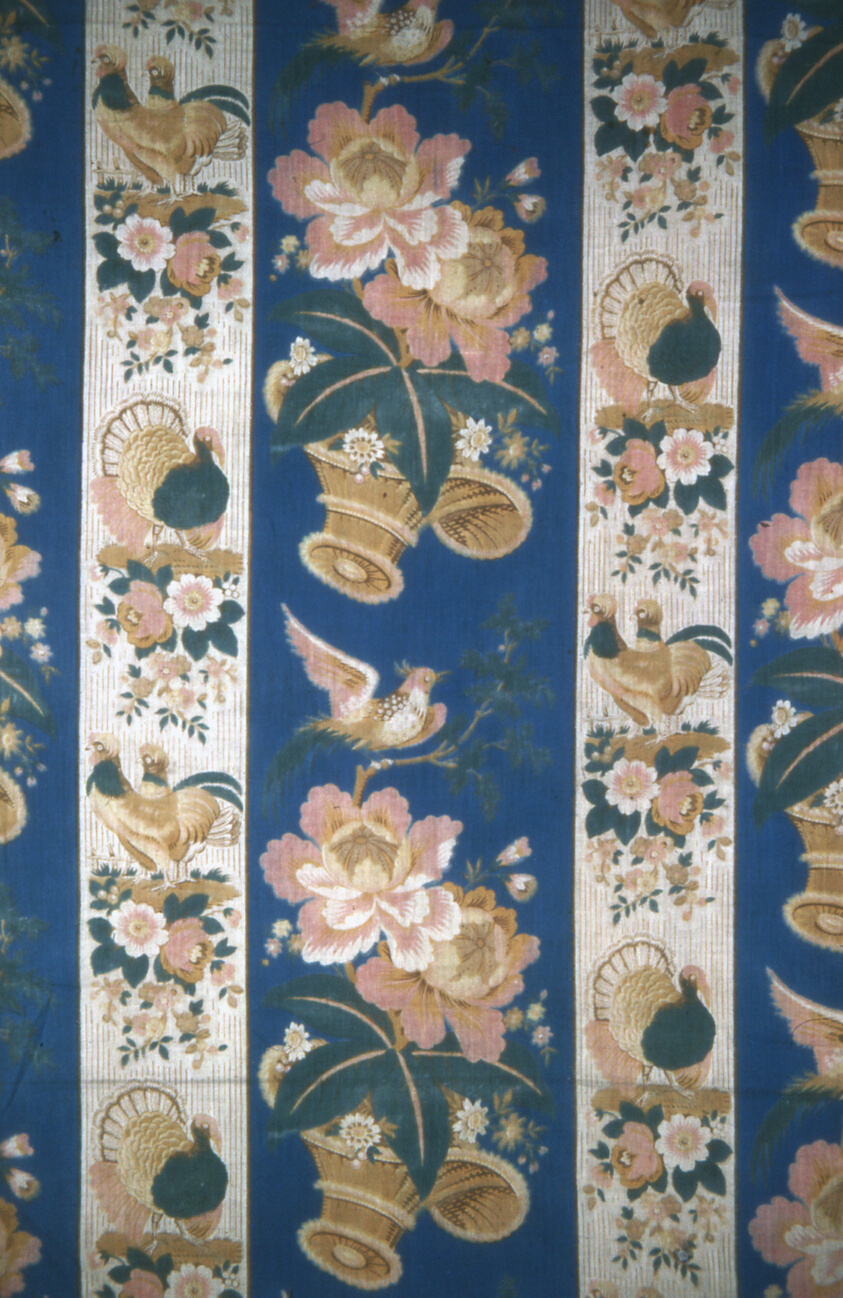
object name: Textile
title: Panel (Furnishing Fabric)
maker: England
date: 1800/25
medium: Cotton, plain weave; printed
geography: England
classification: textile; weaving - printed; weaving; furnishing textile